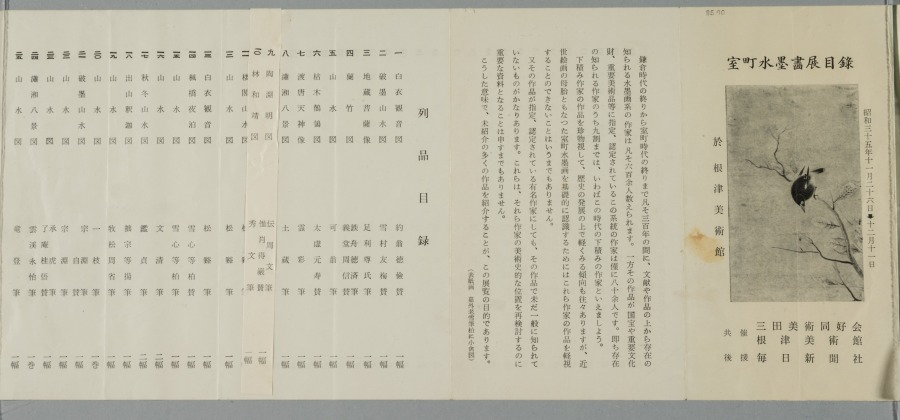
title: Wagtails and Narcissus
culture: Japan, Muromachi period (1392–1573)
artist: Eison (Japanese)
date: mid-1500s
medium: hanging scroll; ink on paper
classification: Painting